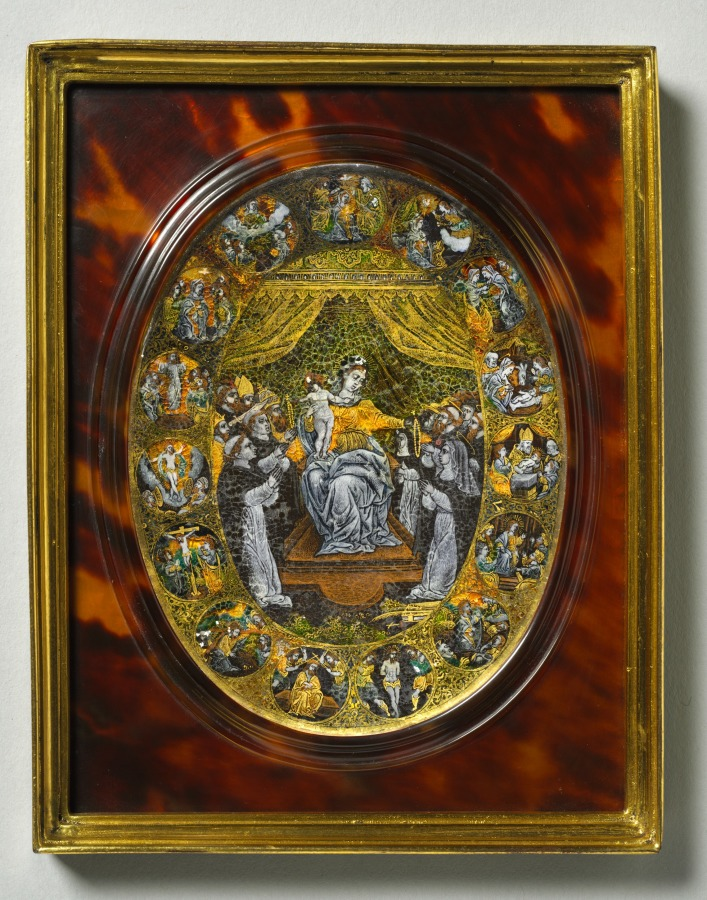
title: Plaque Depicting the Madonna and Frame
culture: Italy, 16th century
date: mid 1500s for plaque c. 1600 for frame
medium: enamel on copper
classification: Glass